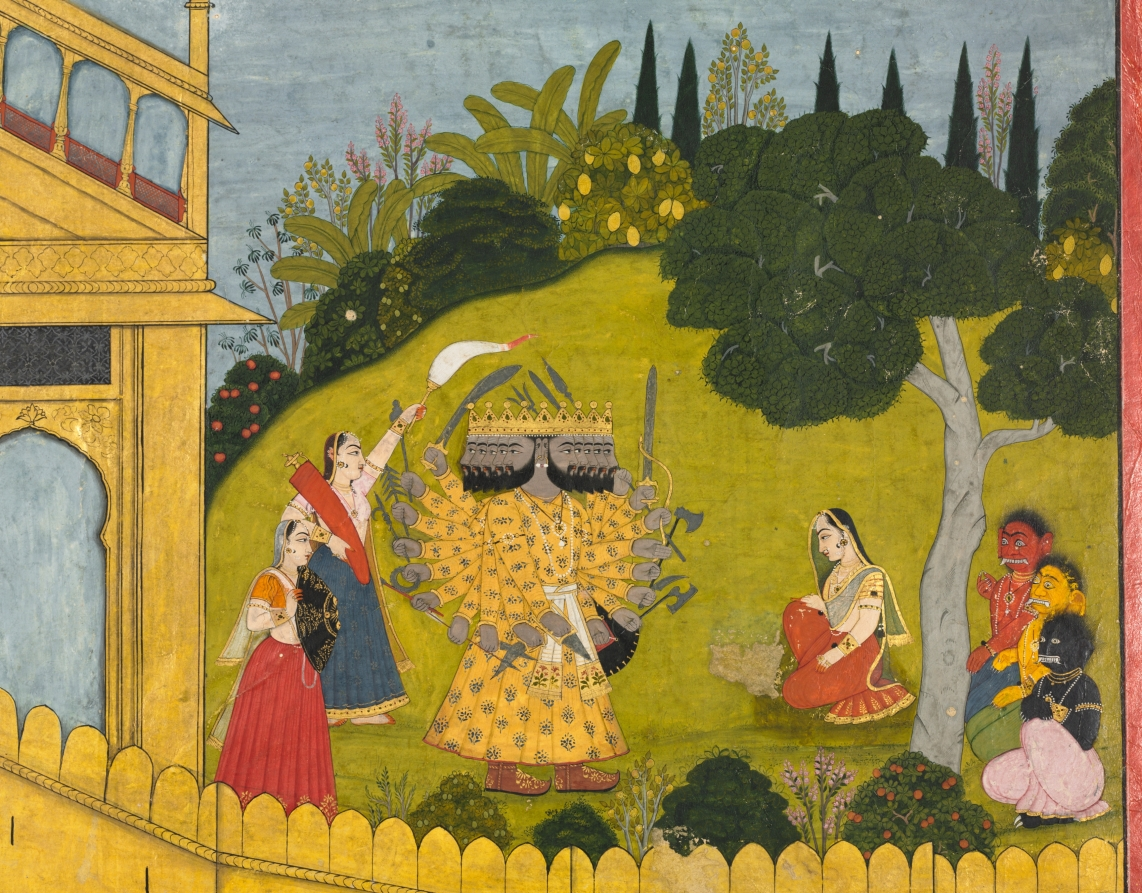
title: Ravana addresses Sita in the garden of Lanka, from Chapters 53 and 54 of the Aranya Kanda (Book of the Forest) of a Ramayana (Rama’s Journey)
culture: Northern India, Pahari kingdoms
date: c. 1725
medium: Gum tempera, gold, and silver on paper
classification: Painting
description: The viewer is cut off from Lanka by the surrounding sea and the city’s golden walls in this expansive composition probably intended for courtly display This choice of perspective cleverly emphasizes the captivity of the Sita, faithful wife of the hero Rama. She kneels beneath an ashoka tree, guarded by demonesses. The princess’s abductor, the 10-headed and 20-armed demon lord of Lanka, Ravana, appears twice in the image. In the palace, he consults his council of minions. At the right, he hears Sita’s refusal to marry him. Ravana neither harms her, nor sets her free.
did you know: Ravana’s wives take the forms of beautiful women and fearsome demonesses.